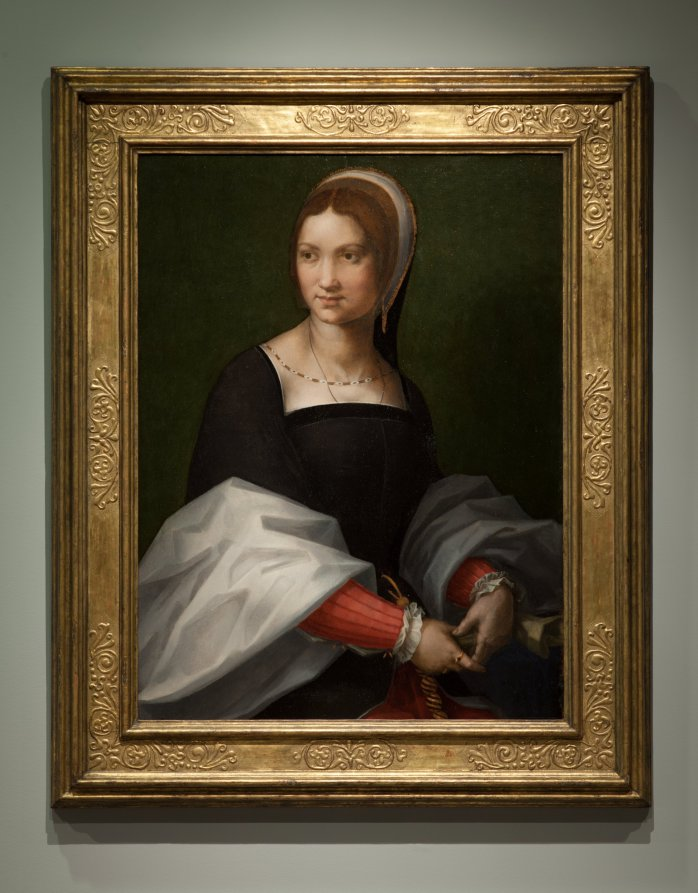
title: Portrait of a Woman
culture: Italy, 16th century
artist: circle of Andrea del Sarto (Italian, 1486–1530)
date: c. 1518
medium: oil on wood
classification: Painting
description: King Francis I’s deep interest in Italian Renaissance culture manifested itself not only through acquiring important works of art but also by bringing leading architects, scholars, and artists to Paris. Chief among these figures was the Florentine painter Andrea del Sarto. The sitter’s distinctively French hood and black veil suggest that someone talented closely connected to the artist painted this work during his brief time in France.